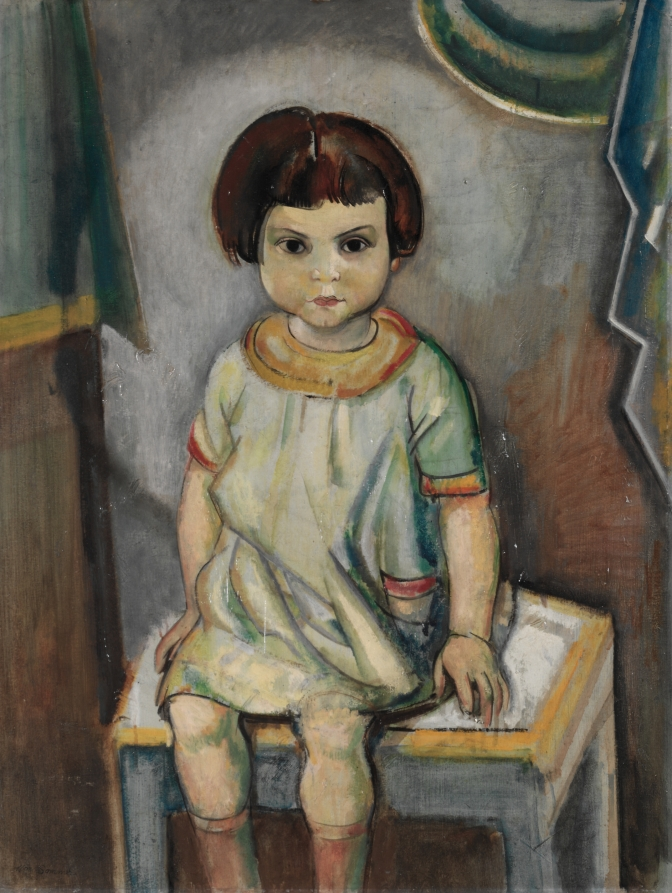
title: June (recto)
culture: America, Ohio, Cleveland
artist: William Sommer (American, 1867–1949)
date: c. 1926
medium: oil on cardboard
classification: Painting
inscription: signed lower left: Wm Sommer.